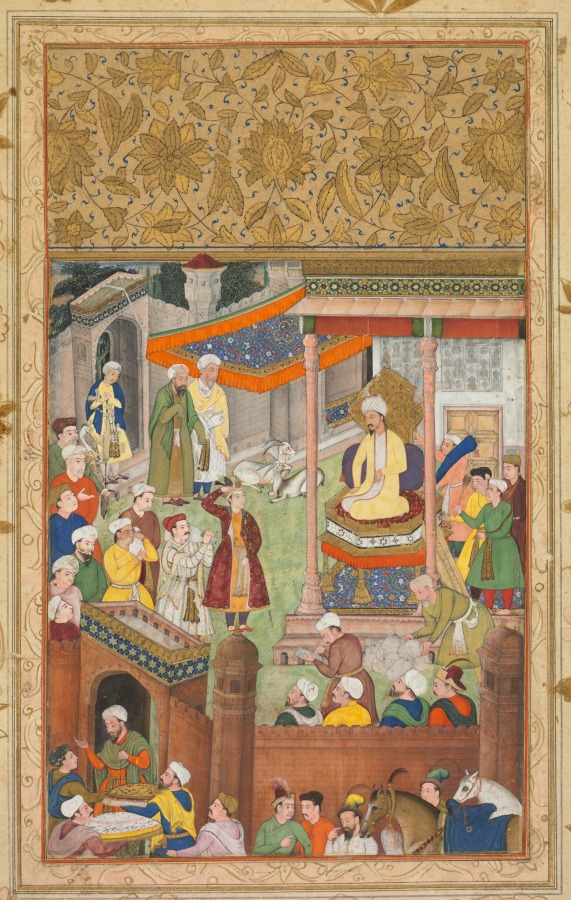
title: Babur receives booty and Humayun’s salute after the victory over Sultan Ibrahim in 1526, from an Akbar-nama (Book of Akbar) of Abu’l Fazl (Indian, 1551–1602)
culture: Mughal India, court of Akbar (reigned 1556–1605)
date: c. 1596–1597 or 1604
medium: Gum tempera and gold on paper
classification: Painting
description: The first Mughal emperor Babur sits enthroned as men bring gifts and sacks of tribute to mark a successful expansion of his territories. Emblematic of his role in leading the victory, his son Humayun wears a wine-and-gold robe of honor despite the Delhi heat in late April. Marking the royal space are a carpet and canopy painted with a lapis lazuli ground. The floral vine motif called arabesque swirls around a central lobed medallion. These delicate patterns are inspired from Persian manuscript illuminations. Contemporary historians describe awnings of gold embroidery, brocade, and velvet along with colorful carpets resembling a beautiful flower bed.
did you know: A clerk records the amount of tribute that Babur received from conquered kings.